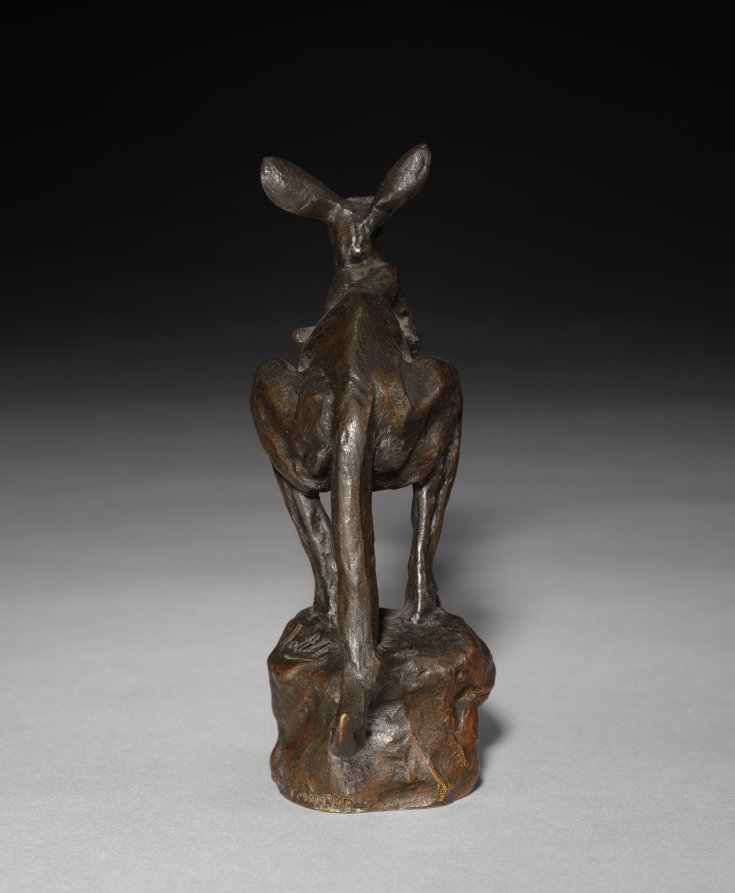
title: Kangaroo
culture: France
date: c. 1900–1925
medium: bronze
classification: Sculpture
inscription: Signed Nottot (?); ANDRO. FONDEUR, lower base